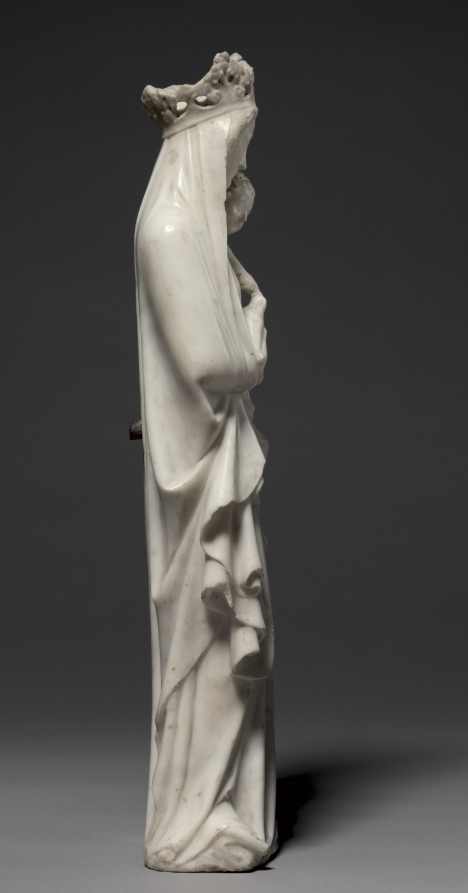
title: Virgin and Child with a Bird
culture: France, Île-de-France, Paris, 14th century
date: c. 1350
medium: marble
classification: Sculpture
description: The Virgin and Child represents one of the most frequent subjects for free-standing sculpture in 14th-century France, motivated by the developing cult of the Virgin and increasing veneration of Mary. Such sculptures were not restricted to churches, but were also found in roadside shrines, entrances to towns, and domestic use in private chapels. The small scale of this statuette suggests it was made for private veneration. The bird, held in the Virgin’s right hand, was a well-known symbol of the human soul and represents Christ’s role as redeemer of humankind.